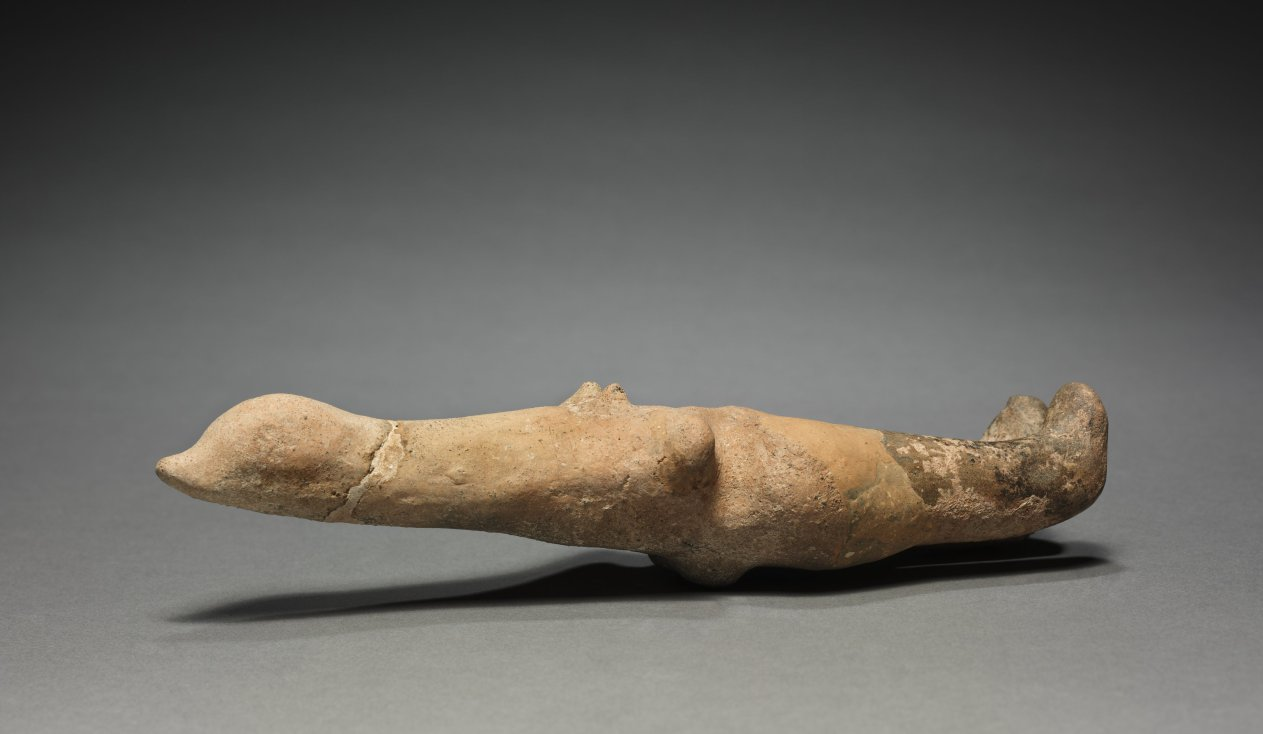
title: Figurine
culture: Iran, Amlash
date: 800s BCE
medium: terracotta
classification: Sculpture